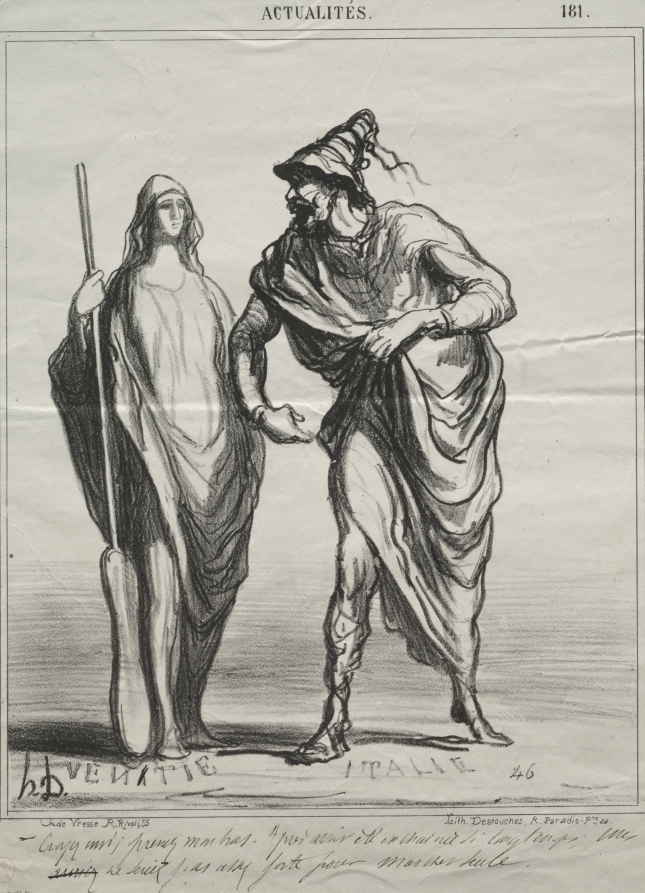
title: Trust me! Take my arm...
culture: France, 19th century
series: News of the Day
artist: Honoré Daumier (French, 1808–1879)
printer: Destouches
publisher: Arnaud de Vresse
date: 1866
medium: lithograph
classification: Print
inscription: Lower margin, in brown ink: - Croyez moi! prenez mon bras. Après avoir été enchainée si longtemps, vous / asuirez? [crossed out] ne seriez pas assez forte pour marcher seule. ; Lower left corner, red stamp ; in ink: E ; in pencil: 2398/sea/300 / 3279 RRR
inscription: Above image, printed: ACTUALITÉS. / 181. ; Lower margin, printed: A. de Vresse, R. Rivoli, 55. / Lith. Destouches, R. Paradis. Pre. 28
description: This print was published in Le Charivari (September 22, 1866) as plate 181 from the series News of the Day.